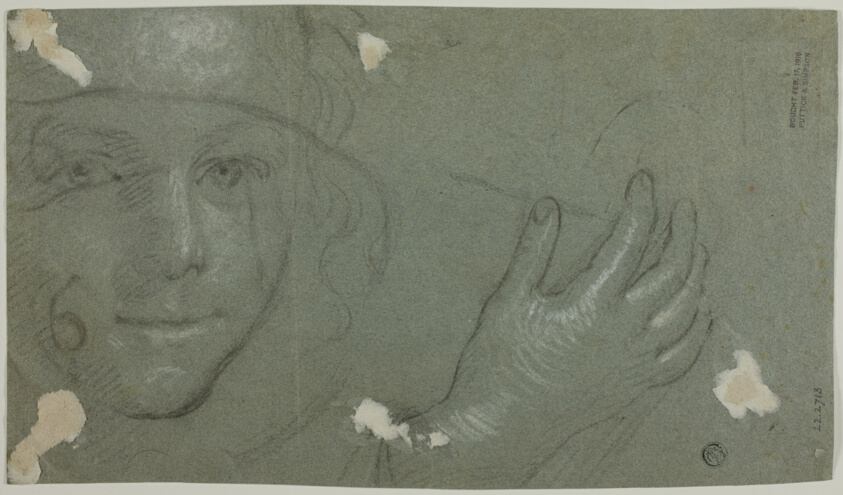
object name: Drawing and Watercolor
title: Seated Male Nude (recto); Sketches of Hand and Boy'd Head (verso)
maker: School of Rembrandt van Rijn (Dutch, 1606-1669); or possibly Jacob Adriaenzoon de Backer (Dutch, 1608-1651); or Matthäus Merian, the Younger (Swiss, 1621-1687); or in the Style of Govert Flinck (Dutch, 1615-1660)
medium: Black chalk, with touches of black crayon, heightened with white chalk (recto), and black chalk heightened with white chalk (verso), on blue laid paper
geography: Holland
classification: chalk; drawings (visual works); prints and drawing